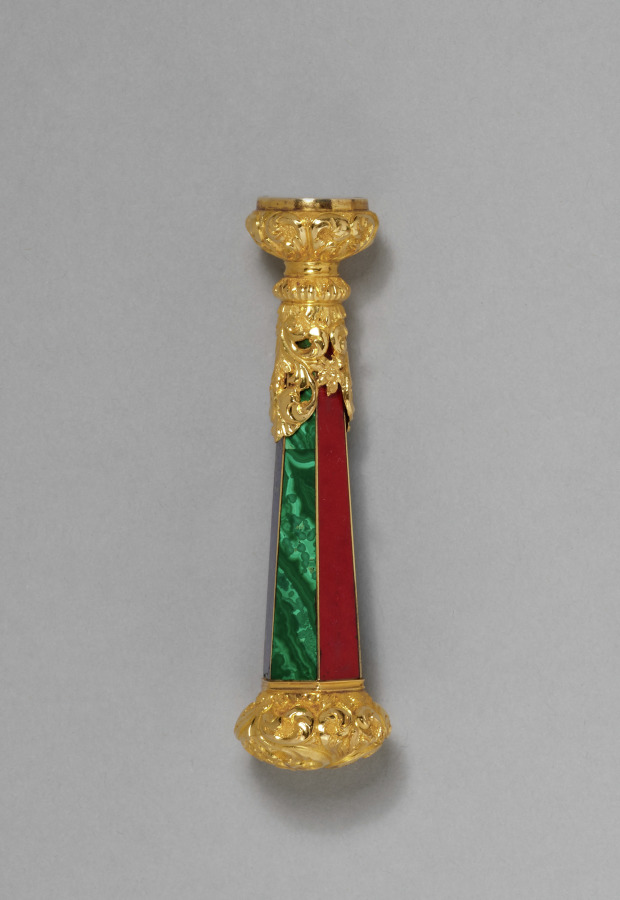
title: Seal from a Writing Set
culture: England, mid-19th century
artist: John Hamilton Mortimer (British, 1740–1779)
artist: and Paul Storr (British, 1771–1844)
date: c. 1830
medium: hardstones including lapis lazuli, malachite, carnelian, agate, gold; original fitted velvet-lined case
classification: Miscellaneous